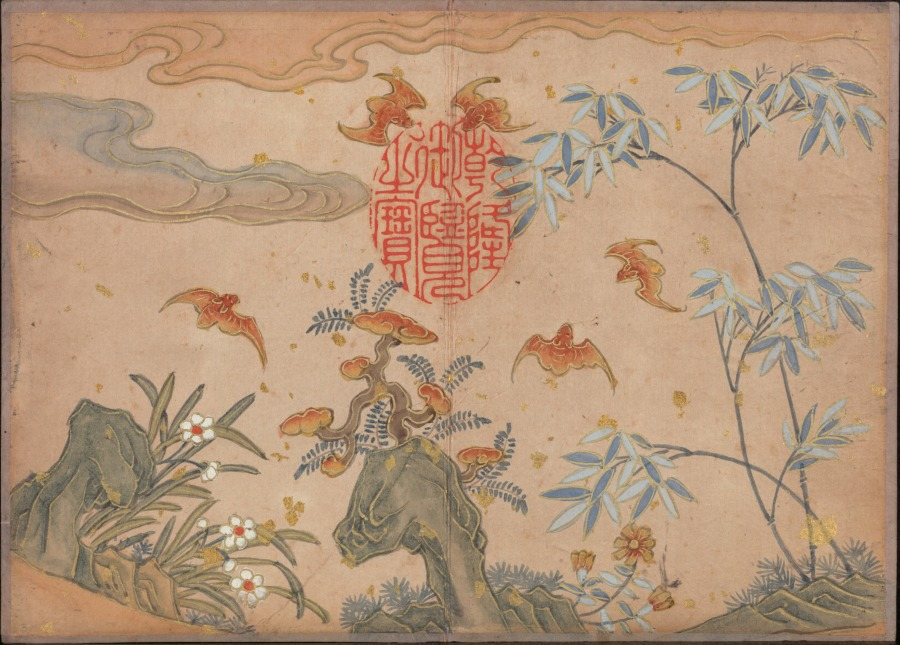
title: Desk Album: Flower and Bird Paintings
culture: China, Qing dynasty (1644-1911)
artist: Zhang Ruoai (Chinese, 1713–1746)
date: 1700s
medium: Album of ten leaves, ink and color on paper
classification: Painting